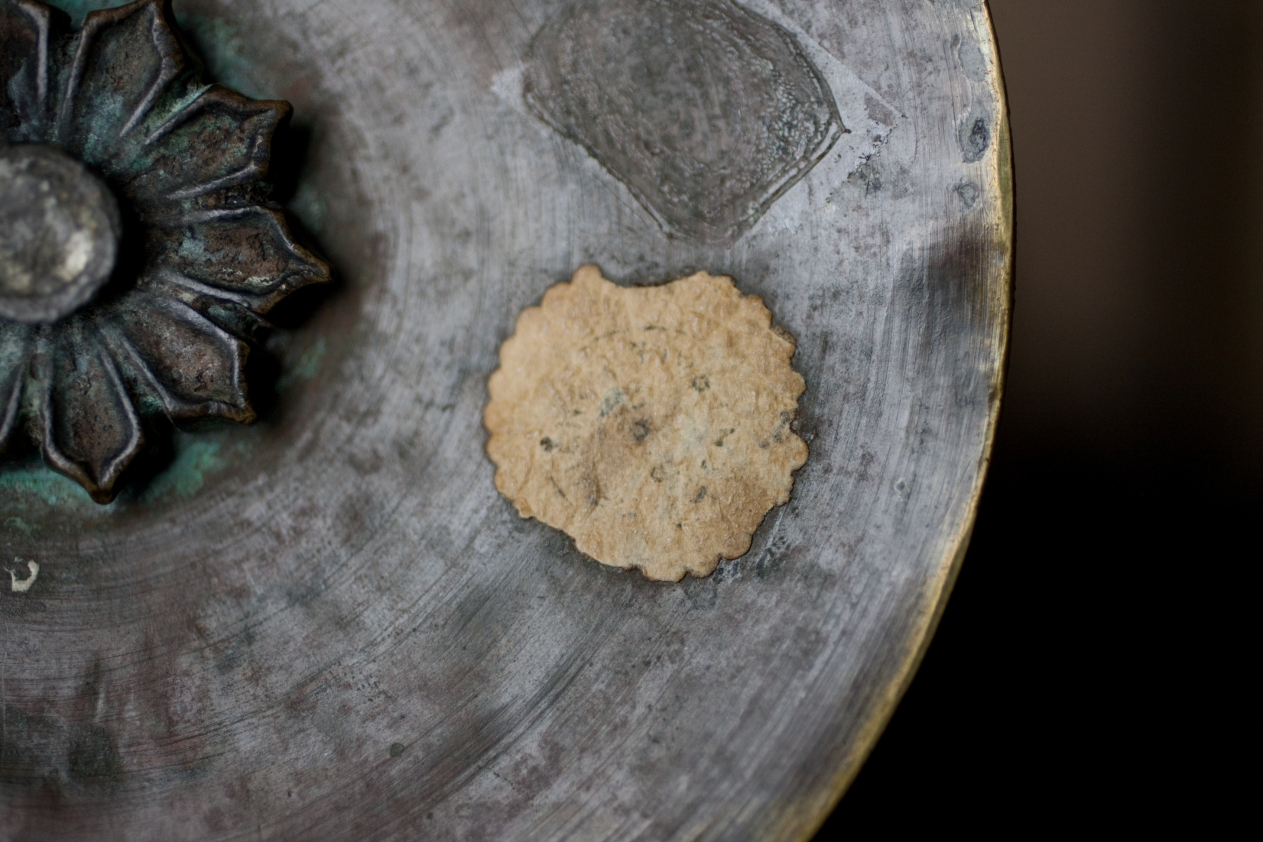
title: Luxury Ewer Extending Good Fortune to the Owner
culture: Iraq, possibly Mosul, Zangid or Artugid Period, 13th Century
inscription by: Ahmad al-Dhaki al-Mawsili (Iraqi, Mosul, active early 1200s?)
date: 1223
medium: brass inlaid with silver; lid and base added later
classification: Metalwork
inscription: Band on the neck (naskh): "Work of Ahmad al-Thaki, the engraver, al-Mawsili, in the year 620 and glory to my owner"; band at the base of the handle (naskh): "Work of Ahmad al-Thaki al-Mawsili"; graffiti of later owners, roughly scratched into the neck of the ewer: "Husayn ibn Qasim"; "Usta al-Muhtasib [?]"; band on the shoulder of the ewer (plaited, animated kufic): "Good luck, and learning, and commanding respect, and prosperity, and pride, and generosity, and faithfulness, and affection, and glory, and survival, and justice, and blessings, and exaltedness, and prosperity, and everlasting peace, and charitable giving."; band on the foot (naskh) [foot is a later addition]; this inscription has not yet been deciphered.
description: This silver inlaid ewer was produced for luxury clientele. The wide band around the body of the vessel displays vignettes of daily and courtly life contained within multilobed medallions. Some of the scenes feature falconry, hunting, dancing, and several groups of musicians. All these scenes are set off against a skillfully executed arabesque background—a pervasive motif in Islamic art characterized by interwoven vegetal and curvilinear elements. An inscription around the ewer’s shoulder extends good fortune, prosperity, and peace to the owner. The ewer is dated 1223 and signed by the master craftsman Ahmad al-Dhaki of Mosul.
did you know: Later owners roughly scratched their names into the neck of the ewer.